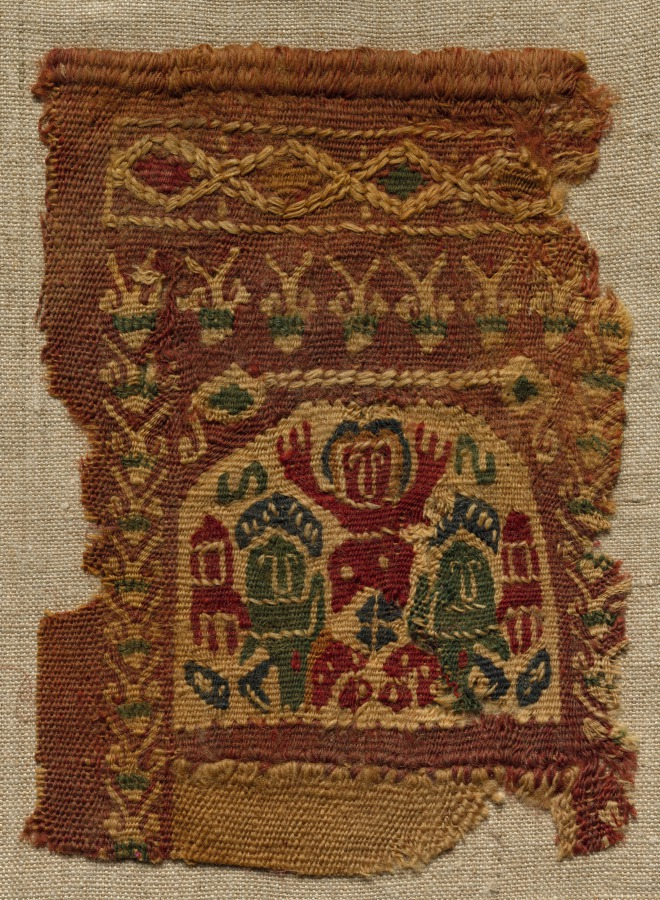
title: Fragment, Part of the Neck Ornament of a Tunic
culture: Egypt, Byzantine period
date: 400s - 600s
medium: tabby ground, inwoven tapestry ornament; wool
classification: Textile